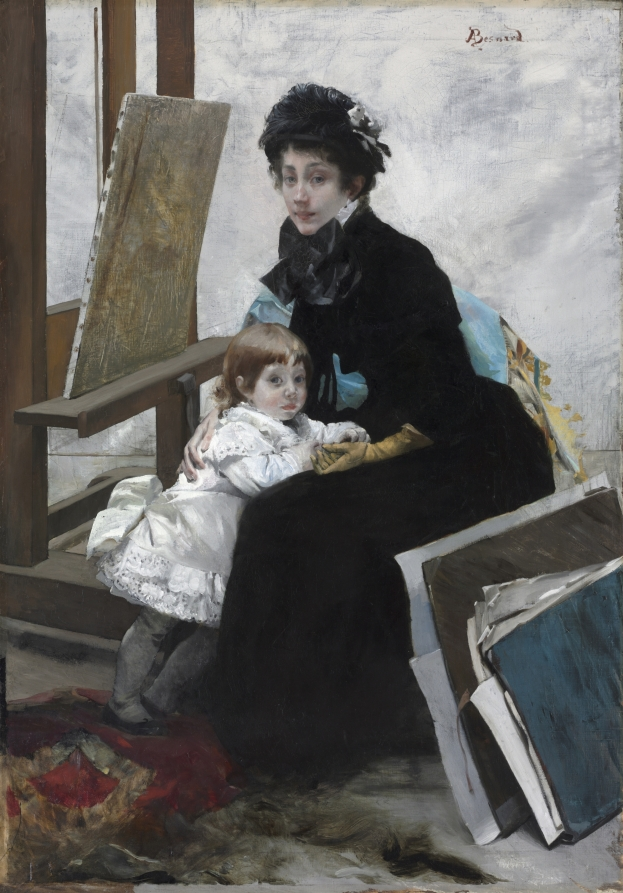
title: Madeleine Lerolle and Her Daughter Yvonne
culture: France, 19th century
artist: Albert Besnard (French, 1849–1934)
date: c. 1879–80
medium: oil on fabric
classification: Painting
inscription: Signed upper right: ABesnard. [AB in monogram]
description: Albert Besnard was a good friend of fellow artist Henri Lerolle, whose wife Madeleine and daughter Yvonne are the subjects of this double portrait set in a studio. The artist’s profession is referenced in the large portfolios of drawings at lower right, and the easel at upper left, which displays a canvas tipped forward at an unusual angle. The canvas has been strapped to the easel in this position so the artist can more easily paint while seated.